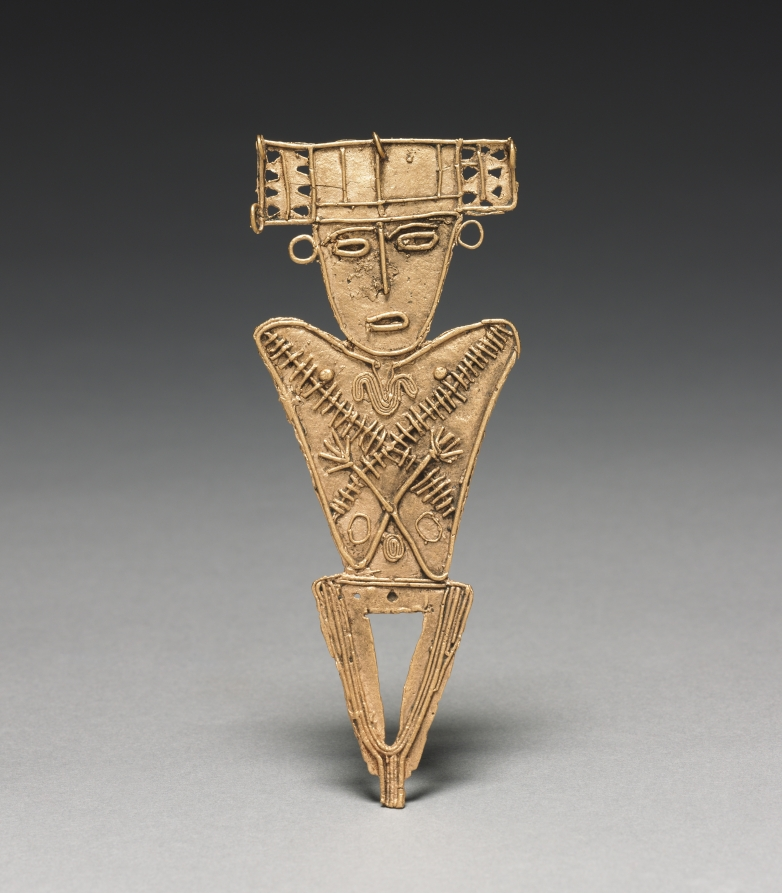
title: Tunjos (Votive Offering Figurine)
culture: Colombia, Muisca style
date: c. 900–1550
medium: cast gold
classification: Metalwork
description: Unlike the other gold ornaments made in the isthmian region, tunjos were not worn; instead, they served as offerings that were deposited in sacred places such as lagoons and caves. They often depict humans who hold something. Perhaps because they were not meant for display, tunjos were not finished after lost-wax casting. Flaws remain uncorrected, surfaces are unpolished, and gold that backed into the channel used to pour the molten metal into the mold was left in place.